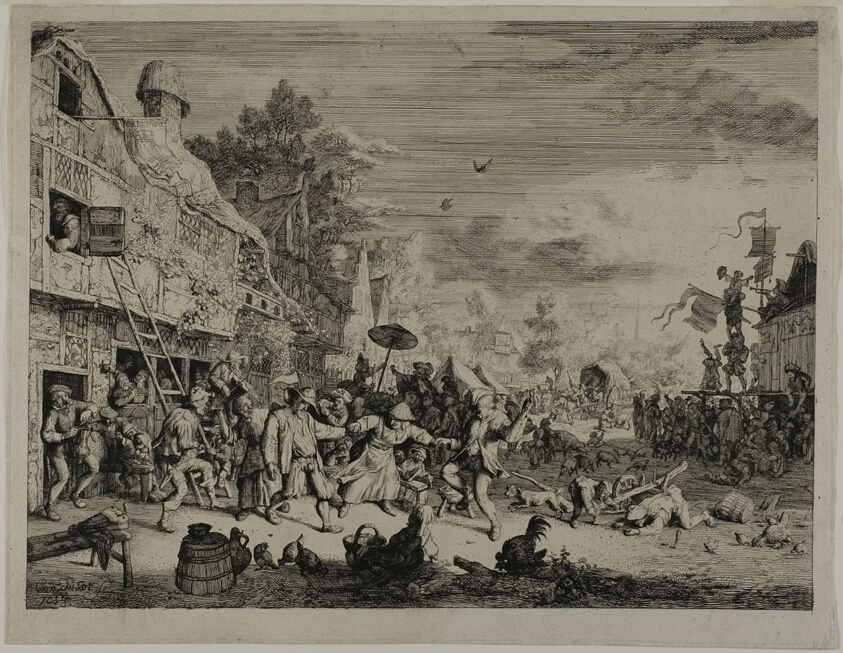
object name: Print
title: The Village Festival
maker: Cornelis Dusart (Dutch, 1660-1704)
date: 1685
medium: Etching on paper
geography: Holland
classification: etching; print; prints and drawing